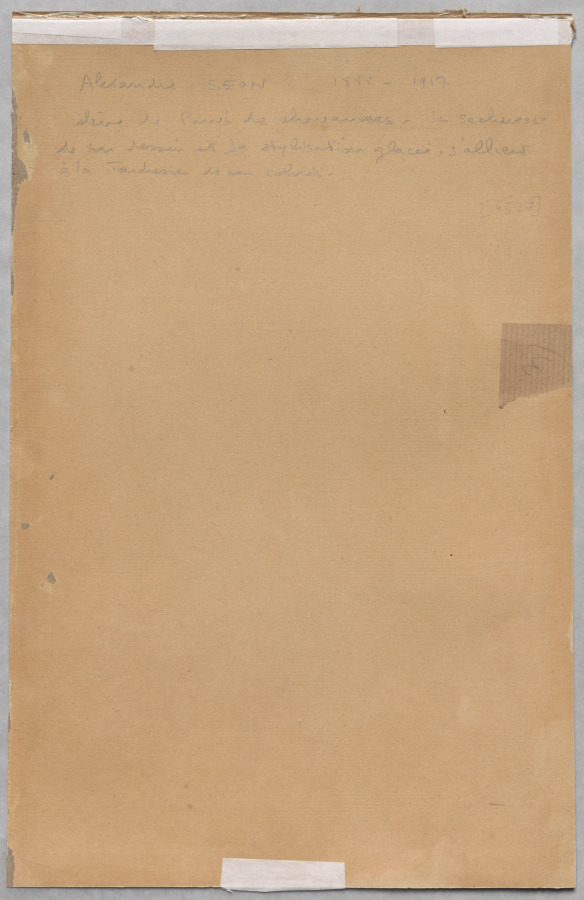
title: Study for “In the Woods, Evening”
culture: France, 19th century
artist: Alexandre Séon (French, 1855–1917)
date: 1892–94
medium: colored pencils on beige laid paper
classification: Drawing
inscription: inscribed, lower right, in blue pencil: Alex Séon; on verso, along top margin, in pencil: Alexandre SEON 1855–1917 / elève de Puvis de Chavannes ¬– la secheresse / de son dessin et sa stylization glacée, s’allient / à la tendresse de son couloris – / [4527]; on verso, on tape at right center, in pencil: 3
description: In this drawing of nymphs holding lyres, Alexandre Séon hoped to depict, in his words, “the spirit of the forest.” He was inspired by fairy-tales he heard as a child about the woods near the remote village where he grew up. By applying colored pencils to a roughly textured sheet of paper, Séon evoked the hazy tones of twilight and gave the sheet a dreamlike tenor.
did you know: This drawing relates to a painting that was exhibited to critical acclaim at the 1894 Société nationale des Beaux-Arts—an important avant-garde exhibition—but is lost today.